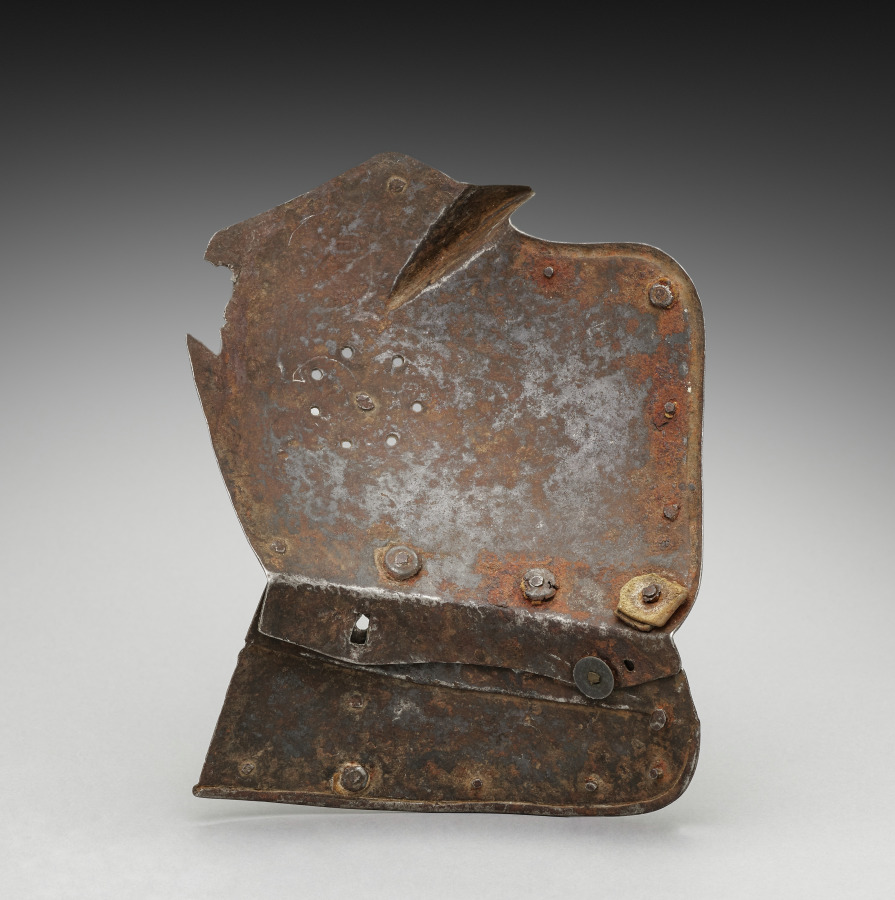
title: Ear Piece of a Helmet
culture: Germany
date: 1500s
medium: steel, brass headed rivets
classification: Arms and Armor